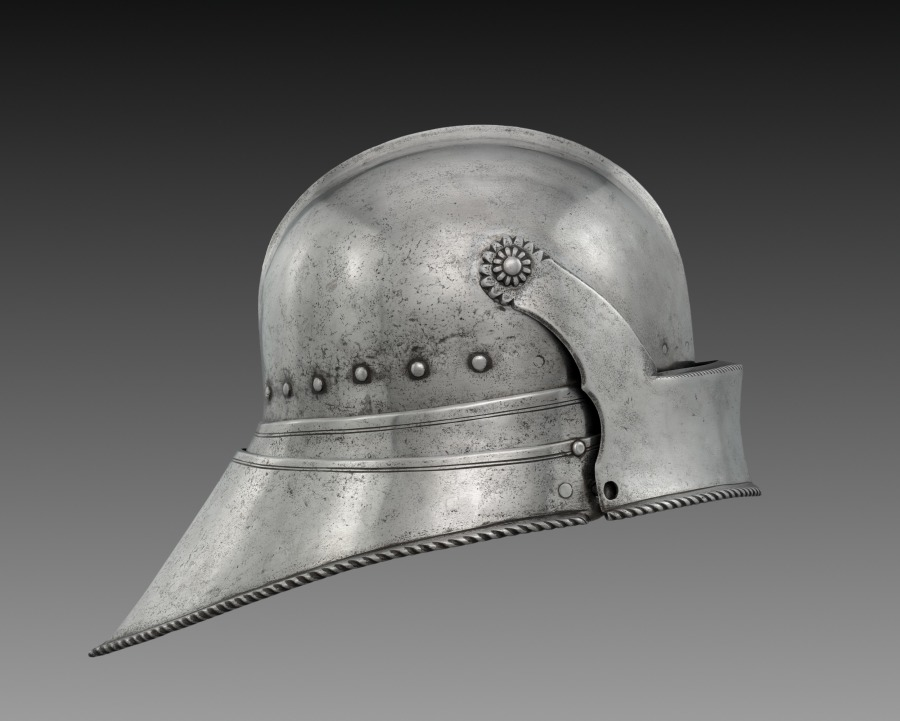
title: Visored Sallet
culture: Germany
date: c. 1490–1500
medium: steel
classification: Arms and Armor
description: The sallet is a partly open-face helmet common in Europe during the 1400s, used in both equestrian and infantry versions. Sallets with movable visors, like this example, are considered to be more technically and visually interesting; beautifully streamlined, it assumes a highly sculptural teardrop shape. Originally it would have been part of a complete suit of armor. The sallet became the quintessential helmet form of the late Middle Ages and is frequently represented in medieval miniatures and woodcuts.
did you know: Medieval sallets were design inspiration for modern-day fireman's helmets.